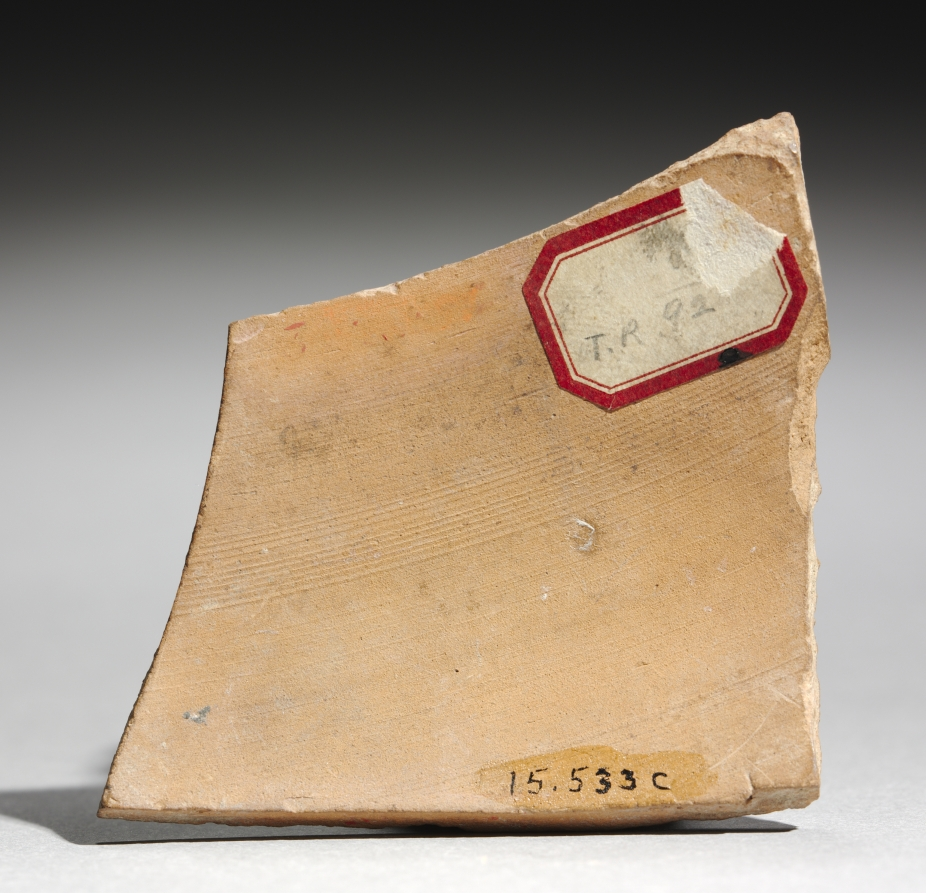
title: Fragment from Black-Figure Neck-Amphora (Storage Vessel): Satyr and Horse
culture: Greek, Attic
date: c. 520–510 BCE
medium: ceramic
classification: Ceramic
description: This small fragment preserves part of a harnessing scene. At left is part of the muzzled head of a horse, guided by a red-bearded satyr wearing a wreath. Before him are the hands of a charioteer—perhaps Dionysos—holding reins and a goad, with a branch in the background. The unfinished interior identifies this as part of a closed vessel, likely a neck-amphora.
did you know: Greek horsemen often muzzled their horses to prevent biting.